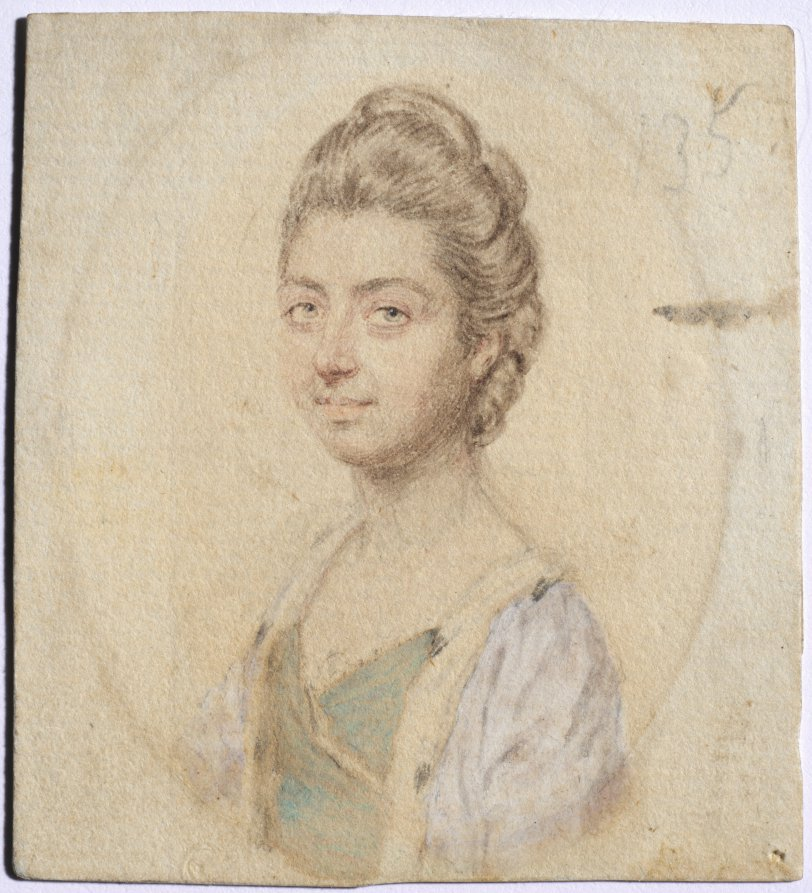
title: Portrait of Sukey, Lady Oglander, née Serle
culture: England, 18th century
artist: John I Smart (British, 1741–1811)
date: c. 1770s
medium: graphite and wash on laid paper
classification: Portrait Miniature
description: Although it is impossible to say if it was always part of the artist’s process to execute a preparatory sketch prior to painting each miniature, we do know that John Smart retained many hundreds of these sketches. A group of preparatory sketches—of which this portrait is one—descended through the Smirke family after Smart’s daughter Sarah gave a sketchbook containing preparatory portrait studies to her friend Mary Smirke, sister of the celebrated Victorian architect Sydney Smirke. This book was probably broken up around 1877 when it was divided between Sydney’s daughters Mary Jemmett and Mrs. Lange, whose portions were both sold at auction in 1928. G. C. Williamson was the first to suggest that Smart’s sketches were well known and that they were preparatory studies for the painted miniatures. Williamson listed the names of sitters from the sketches known to him at the time, and they include Lady Oglander. This portrait was assigned the historically colorful but fictitious title of “Duchess of Bourbon” at some point after memory of its true identity had been lost. Giving illustrious titles to portraits of unknown sitters was a popular strategy adopted by dealers during the nineteenth and twentieth centuries, often applied to miniature portraits and, in particular, to Smart’s sketches of women. However, when the paper backing was removed from this miniature, the name Lady Oglander was discovered written twice in graphite on the back. The lower inscription seems to have been reinforced or written later and is probably not in the artist’s hand. Compared to his contemporaries George Engleheart (1752–1829) and Andrew Plimer (1763–1837), whose female sitters were often painted in similar simple white gowns, Smart often lavished more attention on the costumes in his portraits of women, whose dresses incorporated colored silks, printed fabrics, and luxury trimmings like lace and fur, as seen here. The sitter’s head and shoulders face right, and her light hair is dressed high, with flat curls at the back of her head. She has gray eyes and wears a lavender surcoat trimmed with ermine, over a turquoise blue, low-necked dress and white underslip bordered with lace; the ermine trim confirms that the sitter was a titled lady. Smart placed her inside a faintly suggested oval, and the background is unpainted. Sukey, Lady Oglander (née Serle, d. 1805), married Sir William Oglander, 5th Baronet of Nunwell (1733–1806), in 1765. She was the only daughter of Peter Serle of Testwood, Hants, and delighted the Oglander family by bringing £10,000 to the marriage. Sukey had eleven children with William, eight of whom survived childhood. The Oglanders were a prominent and well-loved family on the Isle of Wight, their presence on the island first dating from the time of William the Conqueror and lasting until the title expired in 1874 when the last Oglander Baronet of Nunwell died. This preparatory sketch somewhat resembles a miniature on ivory of the same size that sold at Christie’s, London, in 2000. The sitter’s name is unknown, but she wears a nearly identical green wrap gown and underslip and a lavender surcoat, though it is trimmed with brown fur rather than ermine. Her coiffure is similar to that in the preparatory sketch as well, though in the ivory her hair is ornamented with pearls. The facial features, however, differ, with the sketch representing an older woman having somewhat coarser features. While the portrait may have been idealized in the finished ivory version, it is also possible that the sketch was employed primarily for the costume and depicts another sitter entirely. Daphne Foskett lists among Smart’s work portraits of a Dr. John Oglander and a Lady and Miss Oglander. A preparatory sketch by Smart of a Mr. Oglander sold at Christie’s, London, on June 10, 2010. Another preparatory sketch titled Portrait of John Oglander, Warden of New College, Oxford, was sold at Bonhams, London, on October 30, 2001. These sketches are approximately the same size as Cleveland’s Lady Oglander and may have been commissions related by date or patron. The sale of Smart drawings inherited by W. H. Bose and sold at Christie’s, London, in 1937 included a “Head of Miss Oglander,” “sister to Sir John Oglander of the Isle of Wight,” but this lot was not illustrated, and its relationship to the sketch discussed here is unknown. John Oglander, Warden of New College, Oxford, was the brother-in-law of Sukey, Lady Oglander, and Miss Oglander was probably her sister-in-law Susannah Oglander (d. 1816).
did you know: Sketches helped John Smart work out the particulars of a portrait before commencing the miniature on ivory, and they were useful in the event that a duplicate might later be required.